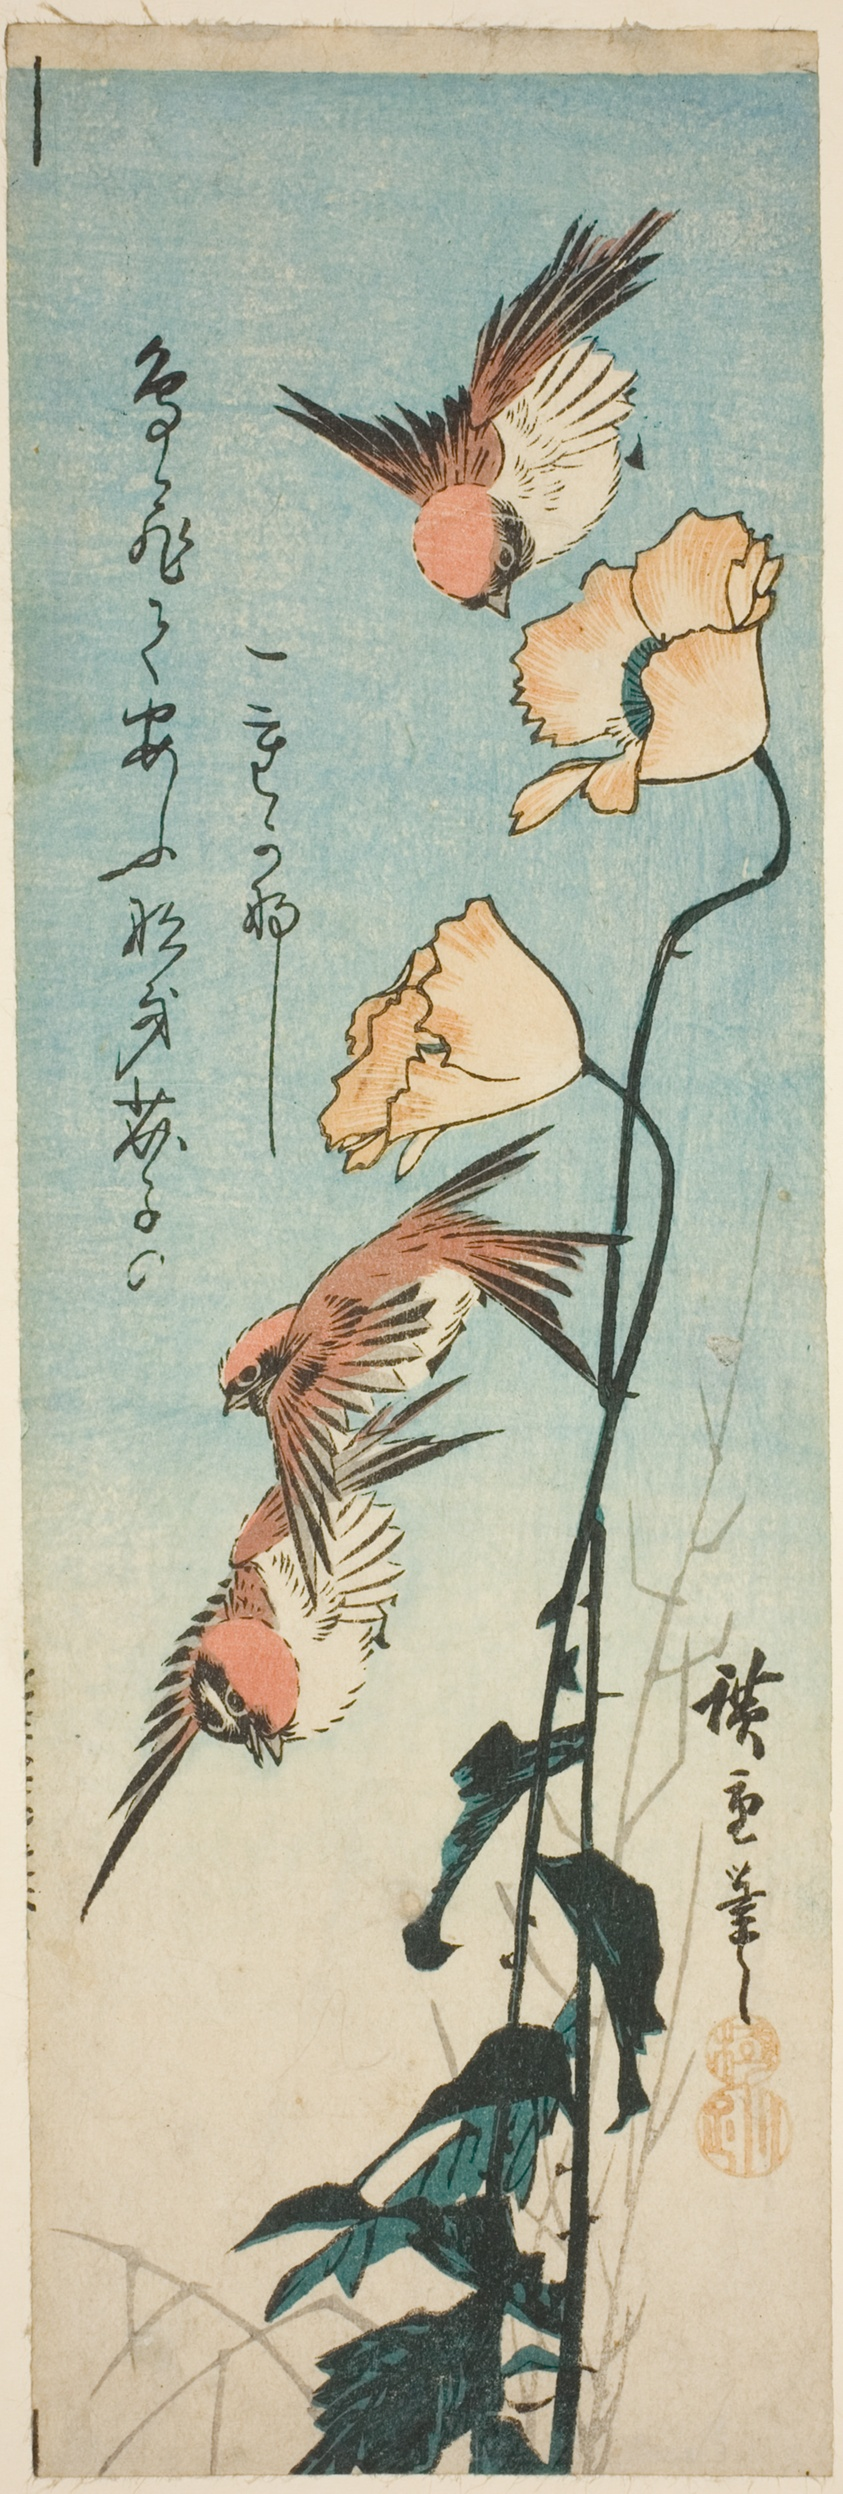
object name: Print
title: Sparrows and poppies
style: Japanese (culture or style)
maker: Utagawa Hiroshige 歌川 広重; Japanese, 1797-1858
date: 1850s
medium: Color woodblock print; aitanzaku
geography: Japan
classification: woodblock print; print; asian art